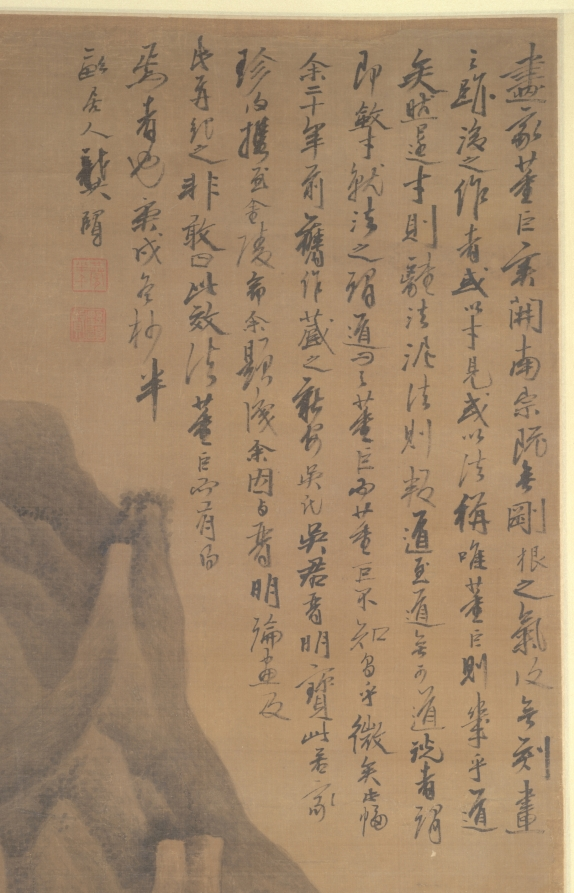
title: Landscape in the Style of Dong Yuan and Juran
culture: China, Qing dynasty (1644-1911)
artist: Gong Xian (Chinese, 1599–1689)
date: c. 1650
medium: hanging scroll, ink with white pigment on silk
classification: Painting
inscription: 畫家董巨，實開南宗。既無剛根之氣，復無刻畫之跡。後之作者或以才見，或以法稱。唯董巨則幾乎道矣。然逞才則離法，泥法則叛道。至道無可道。說者謂即歛才就法之謂道。問之董巨，而董巨不知，忽乎微矣。此幅余二十年前舊作。藏之新安吳氏。吳君晉明寶之若家珍。後携之金陵。命余題識。余因與晉明論畫及此，并紀之。非敢曰此效法董巨而有得焉者也。 庚戌冬杪半畝居人龔賢。 [印]龔半千; 野遺賢; [左下]龔賢; [上]可能另有龔賢一印。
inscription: 2 additional seals of Cheng Qi 程琦 (1911–1988)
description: Towering peaks and unfolding ranges are piled up and overlaid with layer after layer of brushwork to give an overall dense, dark, and even melancholic effect. Gong Xian created a personal style of landscape, which departed greatly from his models Dong Yuan and Juran. The tension between tradition and individuality had been a topic of interest for the Chinese artist. As Gong Xian writes in his inscription: "Painters of later periods may be known for their natural talents or praised for their observance of established traditions. . . . However, those who indulge in showing off their talent will deviate from the tradition, while those who adhere to tradition will alienate themselves from the Dao. The supreme Dao is inexplicable in words. . . ."